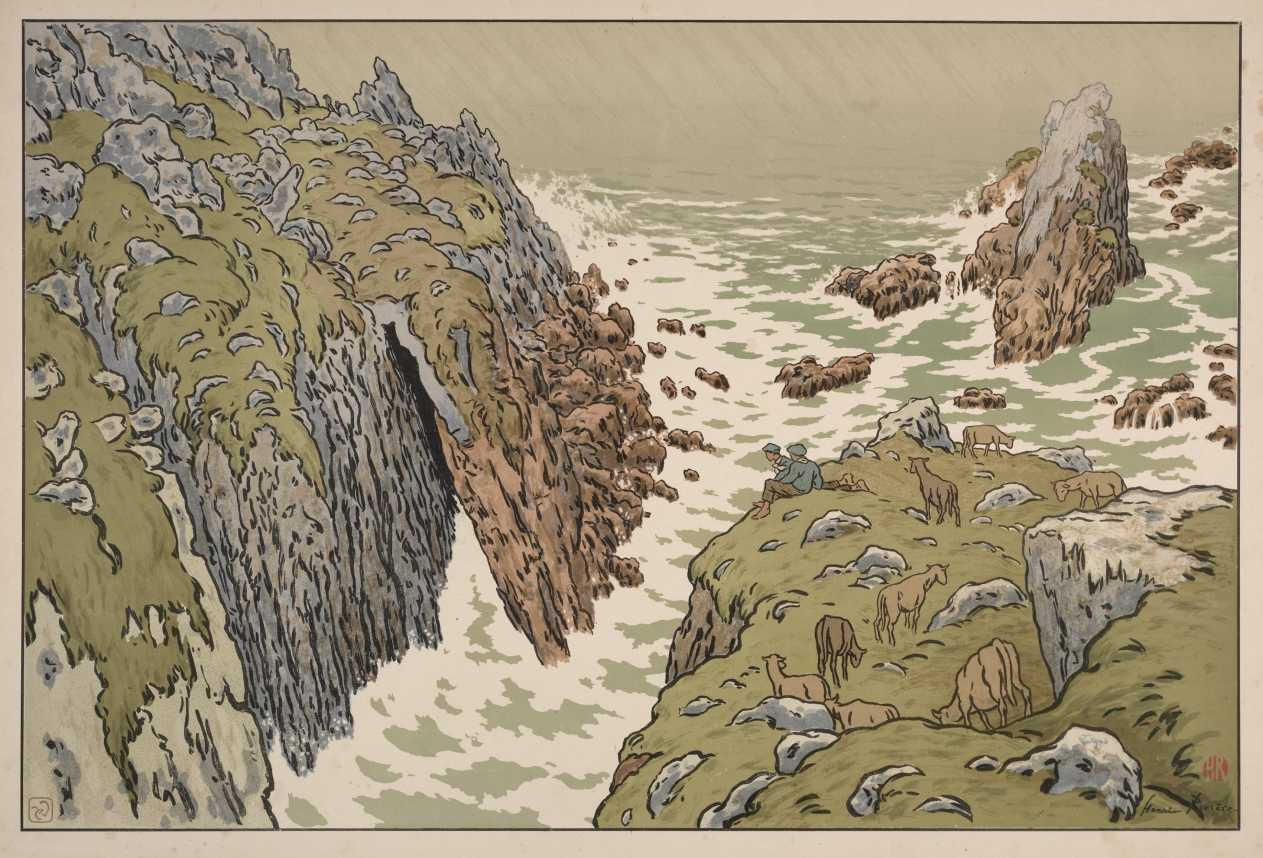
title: Aspects of Nature: The Cliff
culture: France, 19th century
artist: Henri Rivière (French, 1864–1951)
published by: Printed by Verneau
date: 1897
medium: color lithograph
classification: Print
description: One of sixteen images in the series Aspects of Nature, this lithograph depicts a view from Rivière’s summer home in Brittany. Rivière chose this site for the house—perched high atop gray rocks among pine trees and heather—because “[y]ou could believe yourself at the end of the world there . . . the noise of the winds and the sea, the cries of birds . . . a call of a sailor were the only sounds which enlivened the harmonious landscape, which changed in itself and its colors according to the effects and the hours.” This image of two children and a flock of sheep poised on a cliff’s edge overlooking a vast, turbulent sea perfectly evokes Rivière’s description. His brilliantly colored, large-format landscape prints played a pivotal role in the revival of the artistic lithograph at the end of the 19th century in France. The artist championed the idea that prints should be large in size, issued in large editions, and sold for relatively inexpensive prices so that art would be accessible to the general public. Rivière’s so-called mural prints were used to decorate homes, schools, shops, and restaurants.